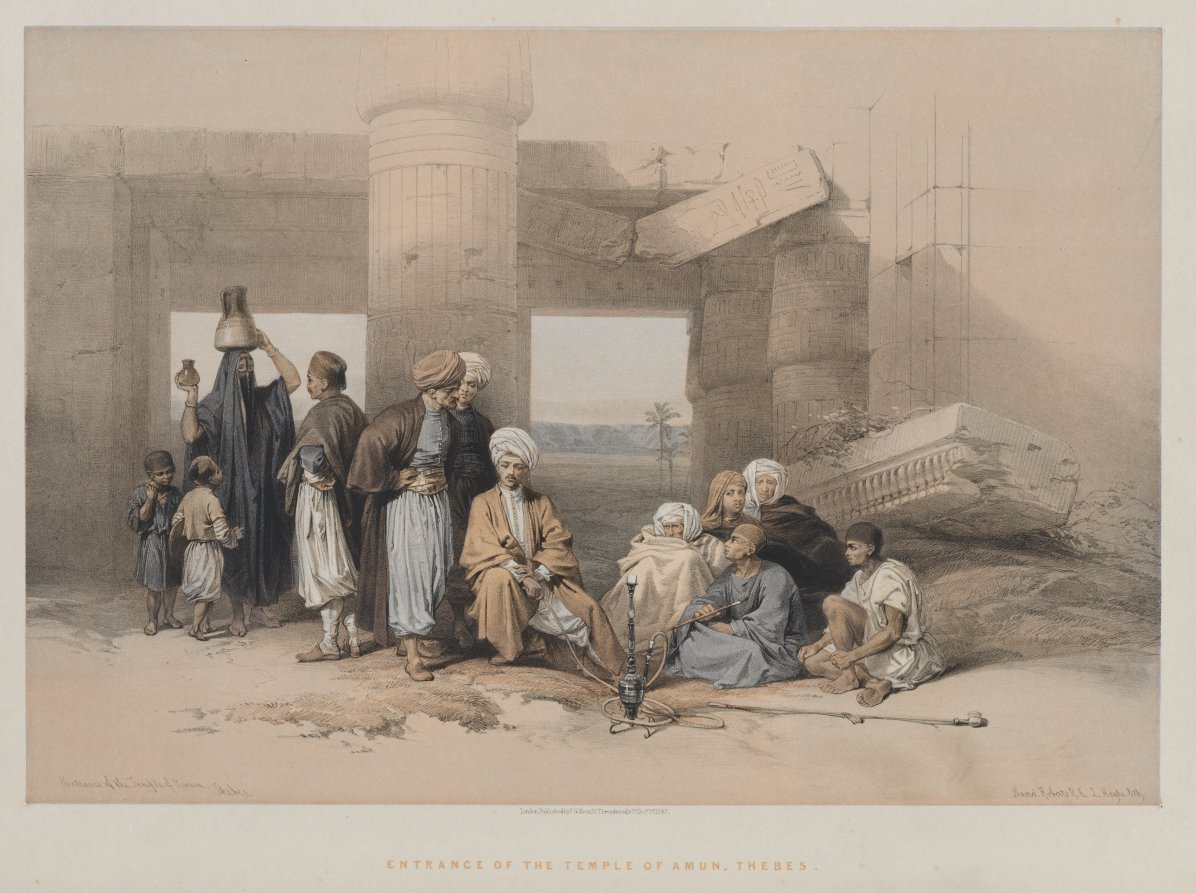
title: Egypt and Nubia, Volume II: Entrance of the Temple of Amun, Thebes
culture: England, 19th century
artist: Louis Haghe (British, 1806–1885)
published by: F. G. Moon (British, 1797–1871)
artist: after David Roberts (Scottish, 1796–1864)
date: 1847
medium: color lithograph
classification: Print